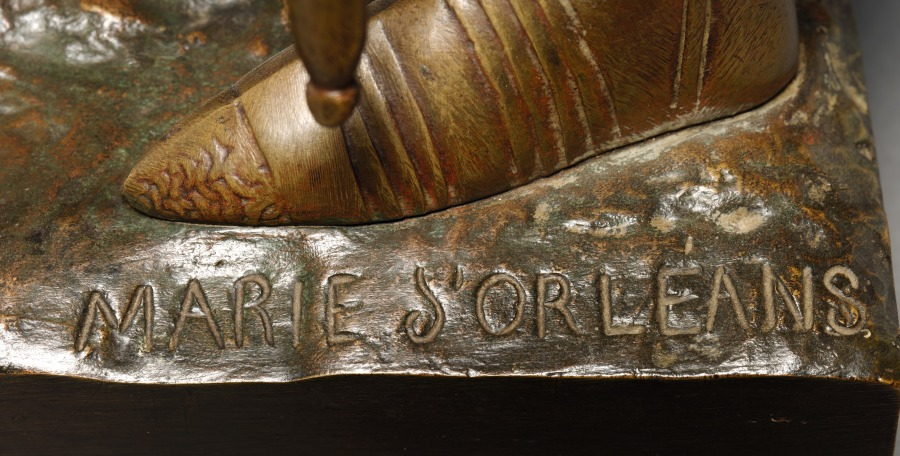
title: St. Joan of Arc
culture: France, 19th century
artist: Princesse Marie-Christine d' Orleans (French, 1813–1839)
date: 1836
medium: bronze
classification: Sculpture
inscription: Signed on top of base: "Marie d'Orléans."; inscribed on left side of base: "Susse Fres Edts Paris."